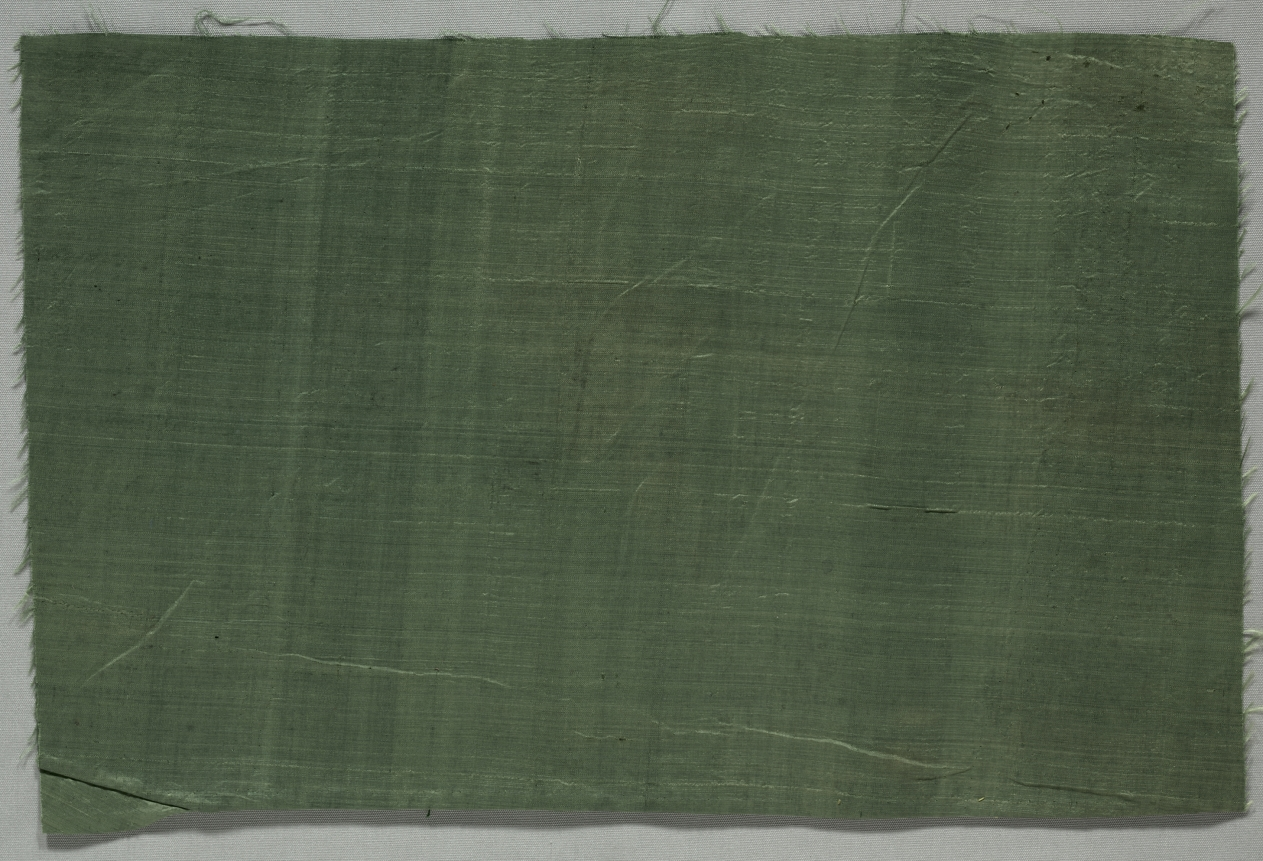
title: Silk Textile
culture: Italy, 17th century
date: 1600s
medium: silk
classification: Textile